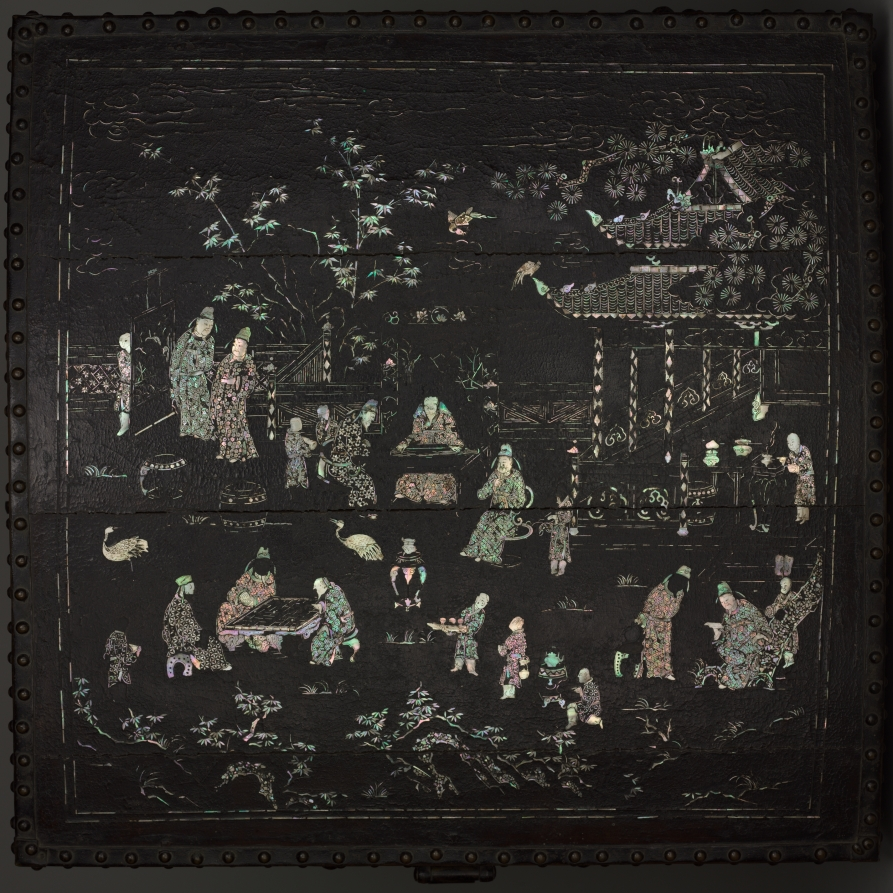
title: Chest for Storing Garments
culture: China, Ming dynasty (1368–1644)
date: 1400s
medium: lacquered wood with mother-of-pearl inlay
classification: Lacquer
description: This precious lacquer box is decorated with bird and plant motifs and figures in mother-of-pearl inlay. The decoration depicts the leisurely pursuit of scholars in nature and a garden setting. Scholars play the board game weiqi, have philosophical conversations, pluck a qin (a zither-like instrument with strings), and read books. Lacquer chests of this type were used to store garments neatly folded along their straight seams. The mother-of-pearl inlay from shells is a technique that was typically practiced by craftsmen in Hangzhou and other parts of southeast China near the sea.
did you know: Lacquer chests of this type were used to store garments.